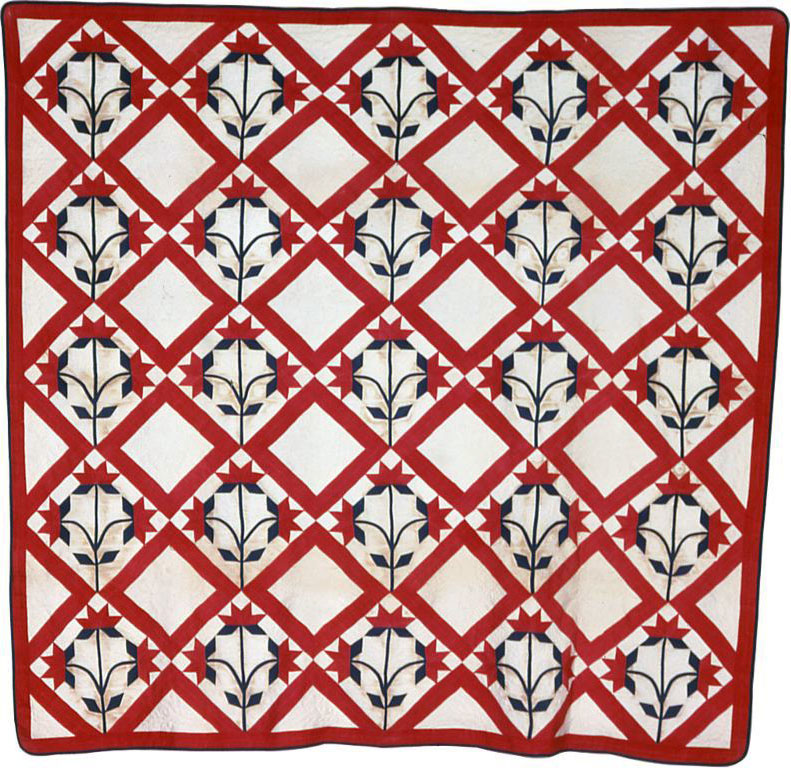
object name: Textile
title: Bedcover (North Carolina Lily Quilt)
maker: United States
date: c. 1850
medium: Cotton, plain weave; quilted; appliquéd and pieced with cotton, plain weave; backed with cotton, plain weave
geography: United States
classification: textile; needlework - quilt